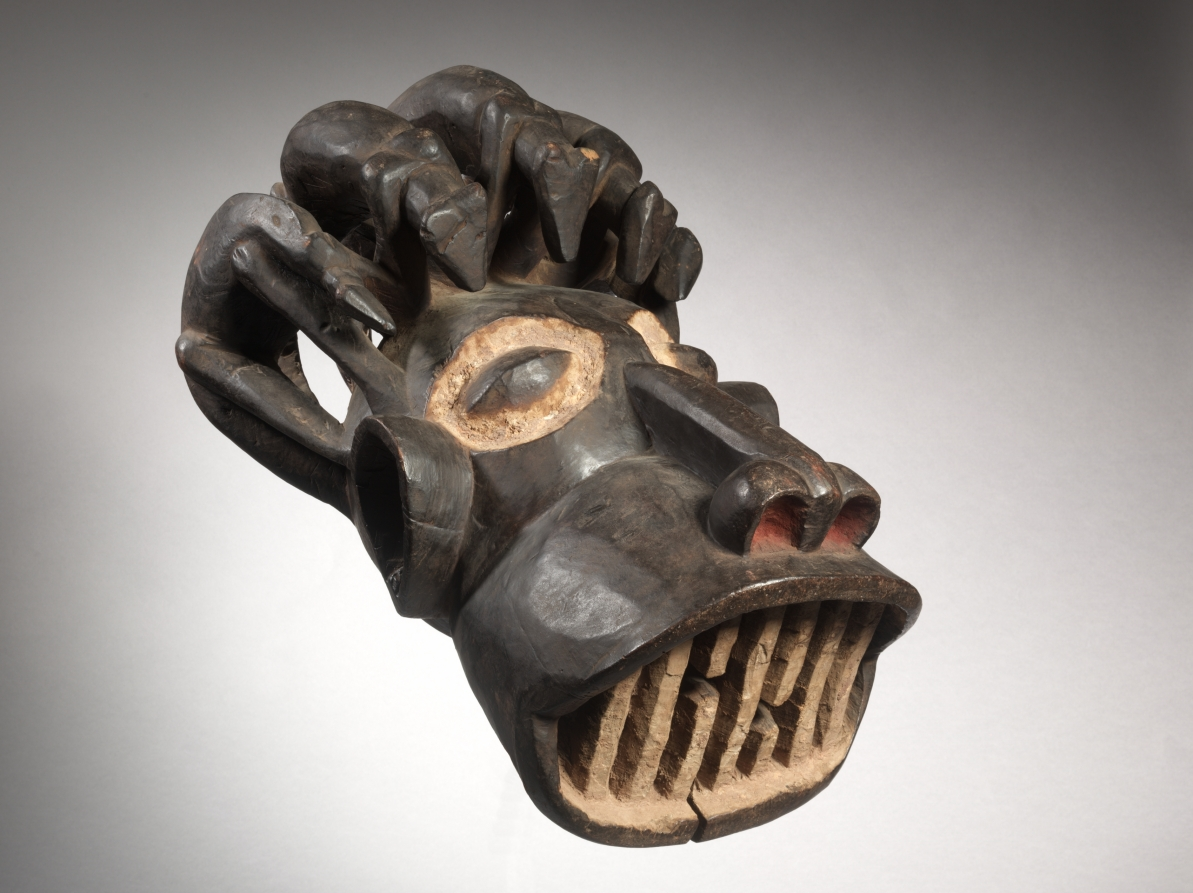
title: Helmet Mask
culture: Africa, Central Africa, Cameroon, possibly Kom-style maker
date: early 1900s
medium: Wood, paint, organic material, and iron alloy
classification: Mask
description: Deliberately distorted and exaggerated facial features reflect the awesome powers of a great chief. The quadrupeds on the mask’s head suggest the close association between the leopard and the king. In the Cameroon grasslands, masks are typically related to a regulatory society that guards ancestral mores; society members wear the masks and dance in the secrecy of the night.